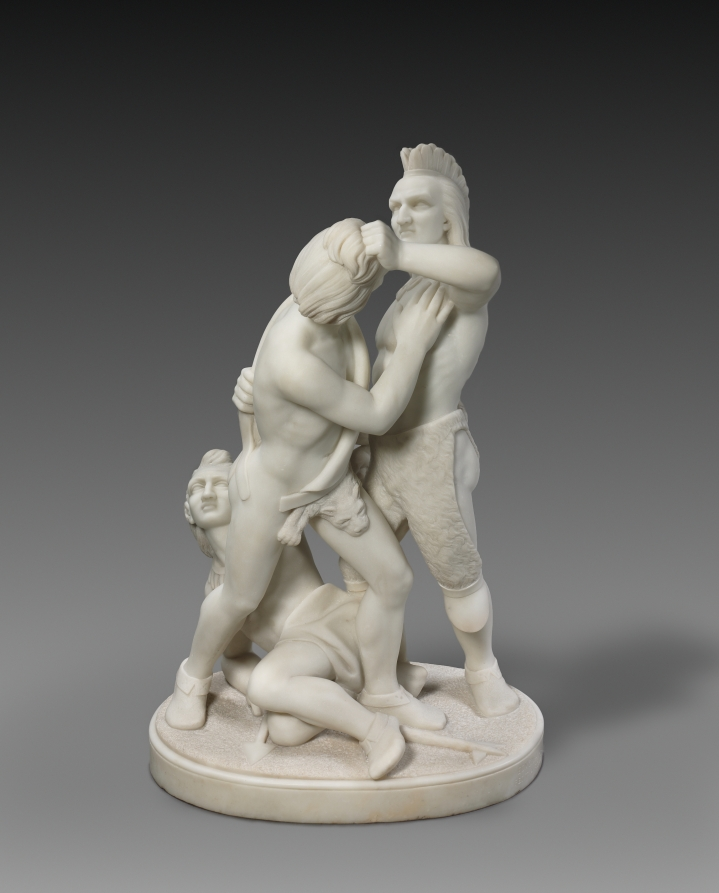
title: Indian Combat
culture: America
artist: Edmonia Lewis (American, c. 1844–1907)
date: 1868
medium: marble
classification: Sculpture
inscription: The base of the sculpture is inscribed: "EDMONIA LEWIS / FECIT A ROME 1868"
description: A spiraling composition with three intertwined figures, Indian Combat ranks as Edmonia Lewis’s most dynamic and complex creation. Although her Native American subjects typically exist in multiple versions, this example appears to be unique. Of Indigenous (Ojibwe) and African American ancestry, Edmonia Lewis studied at Oberlin College and apprenticed with a sculptor in Boston before moving to Rome in 1866. Her sculptures were readily purchased by patrons on both sides of the Atlantic.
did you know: Growing up in her Ojibwe community, Lewis went by a name that translates as "Wildfire."